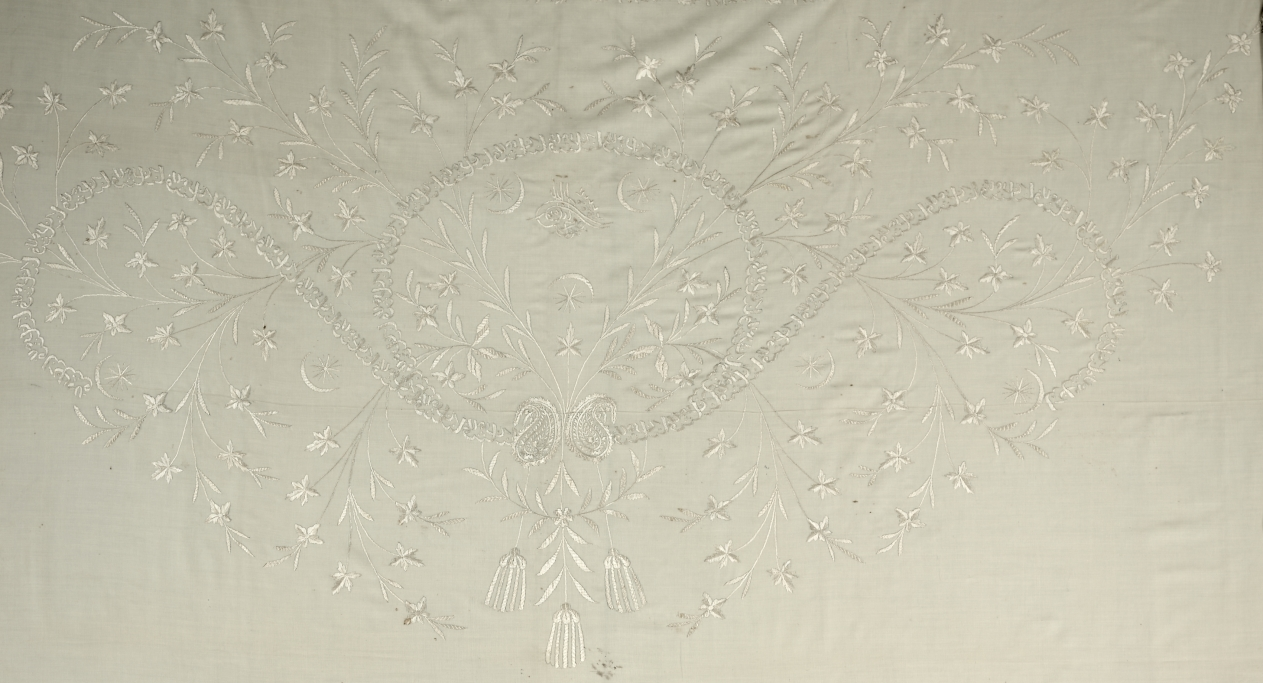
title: Embroidered Robe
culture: Turkey, 19th century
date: 19th century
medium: embroidery; silk on wool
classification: Garment